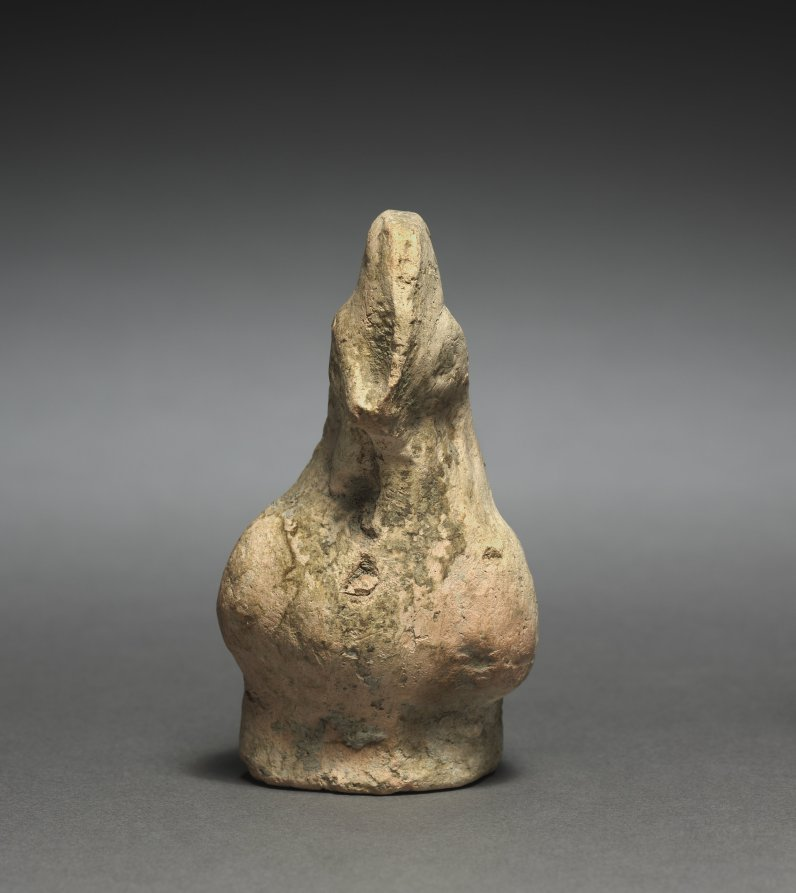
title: Figurine - Rooster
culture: Parthian Empire (247 BCE–224 CE)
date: 1–200 CE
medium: terracotta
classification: Sculpture